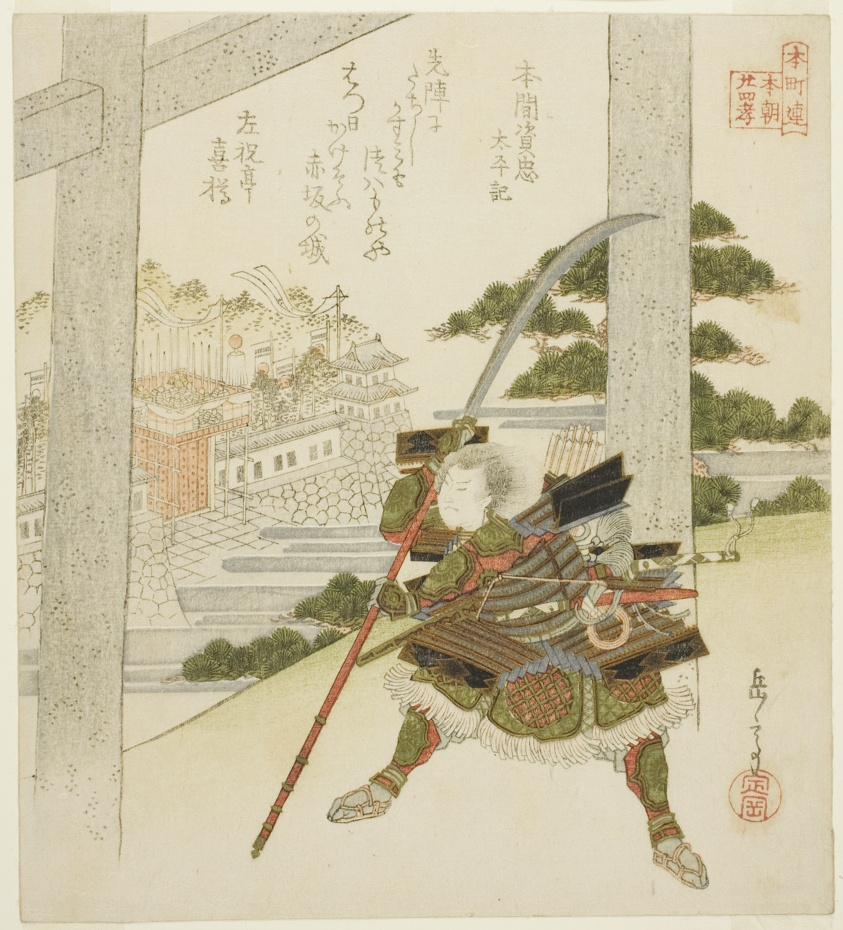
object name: Print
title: Honma no Suketada from the Chronicles of Grand Peace (Honma no Suketada, Taiheiki), from the series "Twenty-four Japanese Paragons of Filial Piety for the Honcho Circle (Honchoren Honcho nijushiko)"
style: Japanese (culture or style)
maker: Yashima Gakutei (Japanese, 1786 (?)-1868)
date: c. 1821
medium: Color woodblock print; shikishiban, surimono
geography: Japan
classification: woodblock print; print; asian art